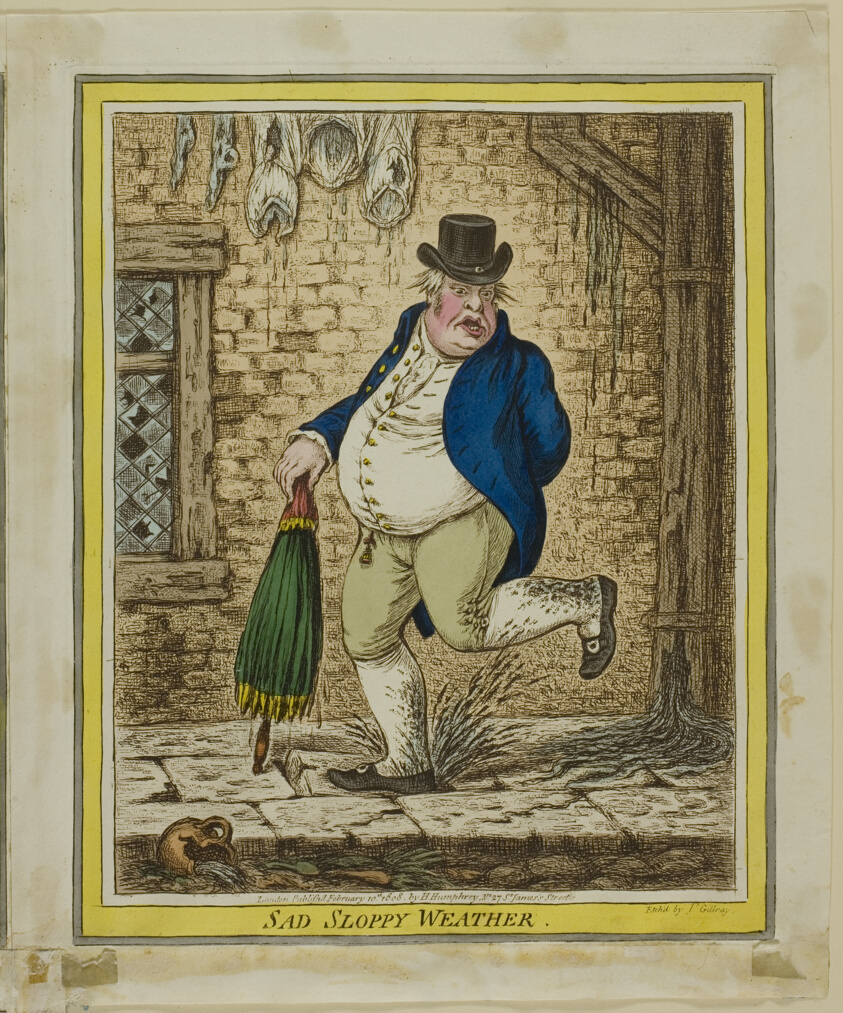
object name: Print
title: Sad Sloppy Weather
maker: James Gillray (English, 1756-1815); published by Hannah Humphrey (English, c. 1745-1818)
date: published February 10, 1808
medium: Hand-colored etching on paper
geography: England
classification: etching; print; prints and drawing